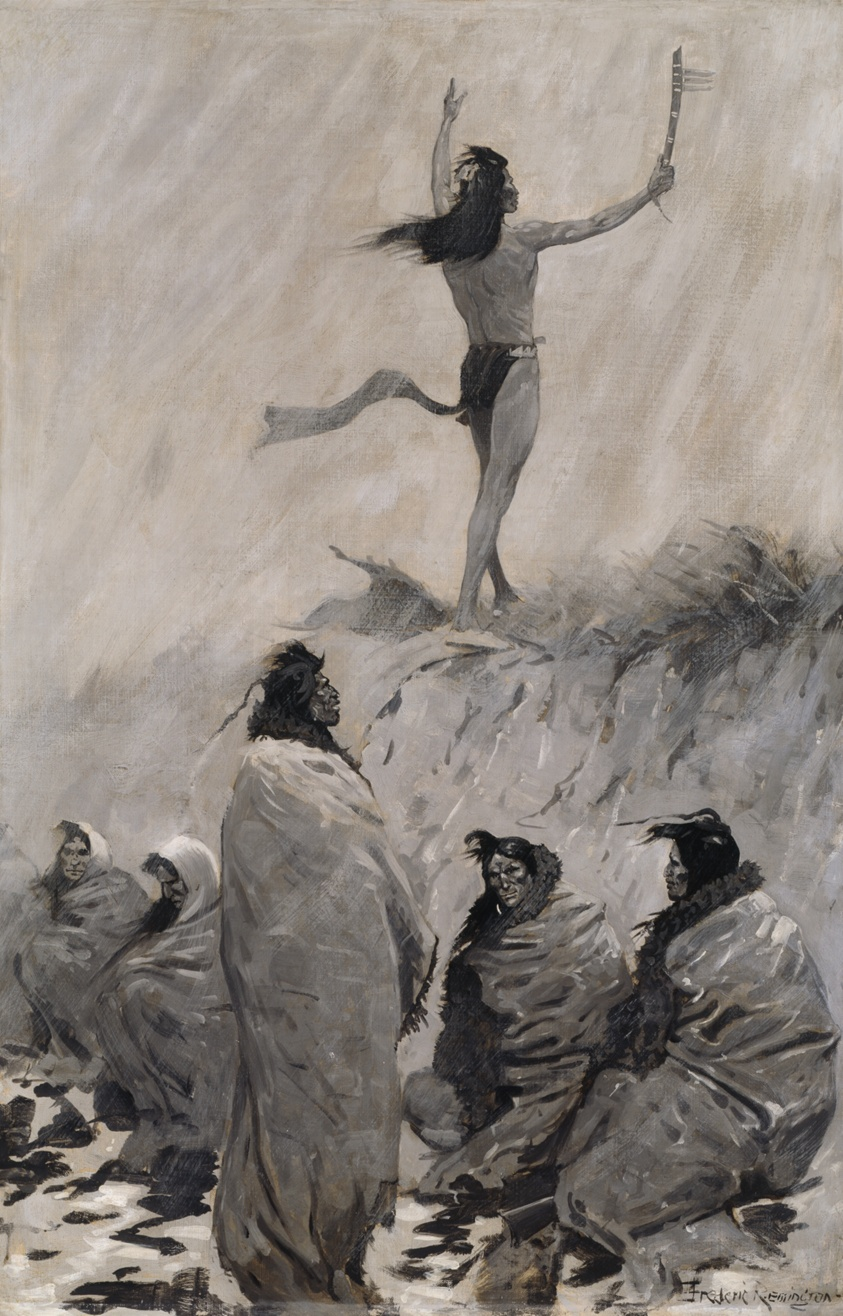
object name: Painting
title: The Fire Eater Raised His Arms to the Thunder Bird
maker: Frederic Remington (American, 1861–1909)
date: c. 1900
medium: Oil on canvas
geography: New York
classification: painting; american arts